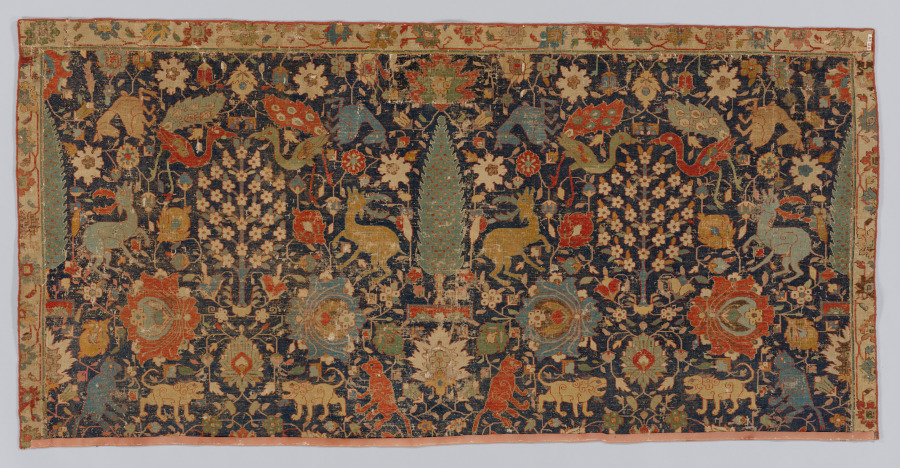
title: Portion of a Carpet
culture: Iran, Northwestern, 17th century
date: 1600s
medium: knotted pile: jufti knot; wool and cotton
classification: Carpet